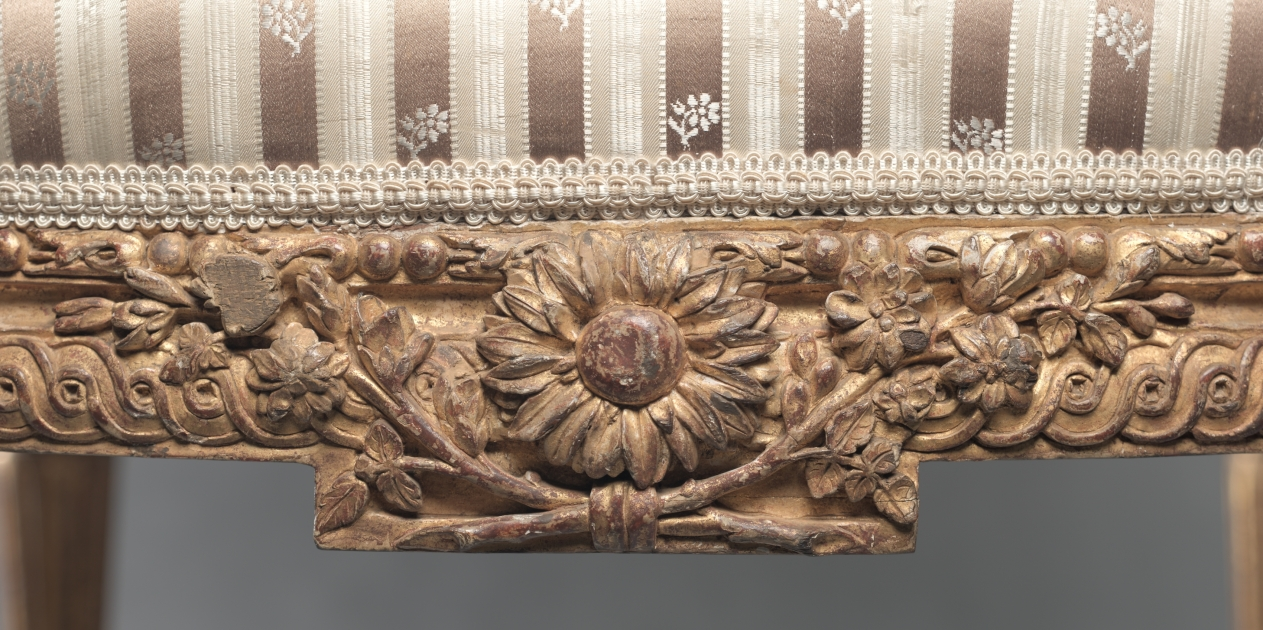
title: Armchair (Fauteuil) (1 of 2)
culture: France, 18th century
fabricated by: Jean-Baptiste II Tilliard (French, 1797)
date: c. 1765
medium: carved and gilded wood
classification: Furniture and woodwork